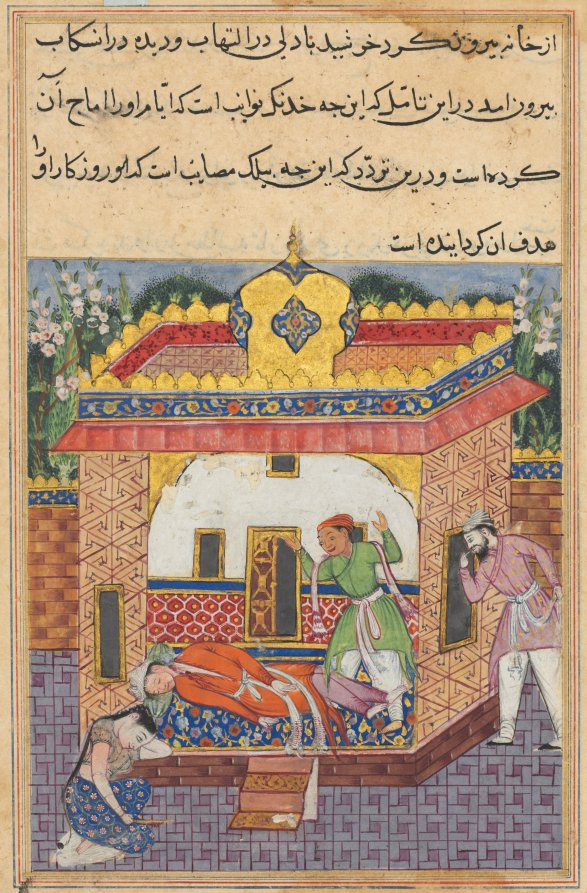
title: Latif, who has murdered his brother, falsely accuses Khurshid of the deed, from a Tuti-nama (Tales of a Parrot): Thirty-second Night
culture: Mughal India, court of Akbar (reigned 1556–1605)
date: c. 1560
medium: gum tempera, ink, and gold on paper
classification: Painting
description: Latif stands above his brother’s body with both hands raised in a gesture of astonishment. Khurshid kneels beside the bed listening to his accusations with resignation. In her hand, she holds the bloody knife that Latif placed there while she slept. On the right, an astonished man peers at the scene of the murder through an open window.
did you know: The next painting from this story is in the Edwin Binney 3rd Collection of the San Diego Museum of Art (1990.143).